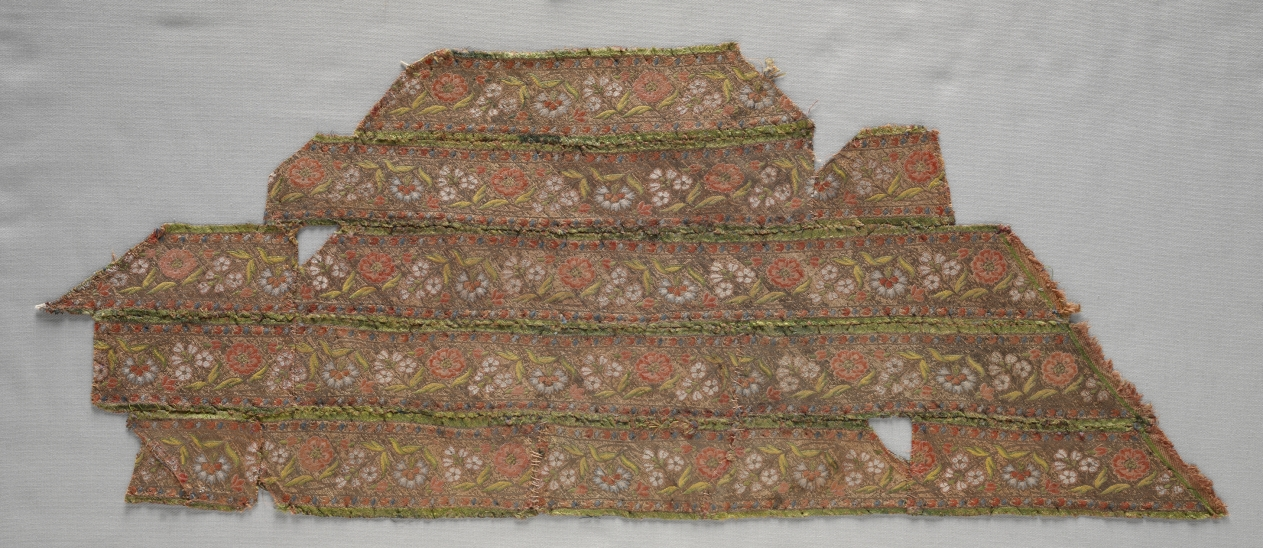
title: Silk Fragments (pieced together)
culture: Iran, 18th-19th century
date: 1700s - 1800s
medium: compound weave: silk and gold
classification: Textile